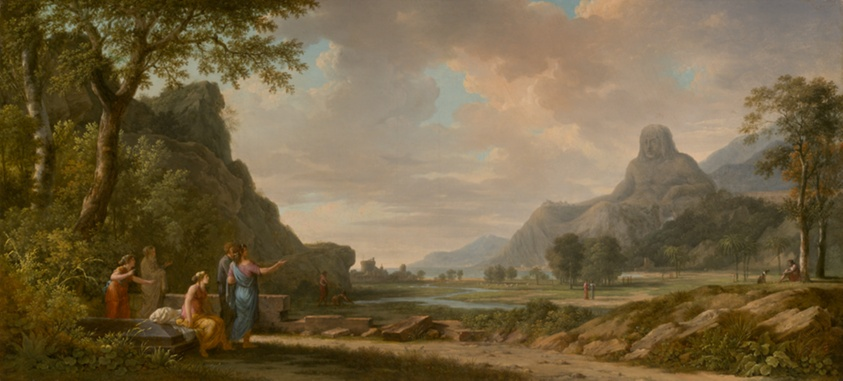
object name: Painting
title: Mount Athos Carved as a Monument to Alexander the Great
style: 18th Century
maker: Pierre-Henri de Valenciennes (French, 1750–1819)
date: 1796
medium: Oil on canvas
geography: France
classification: oil on canvas; paint; oil paintings (visual works); french; painting; european painting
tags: alexander the great, monumental structures, monuments, people, figure, figures, women, men, animals, dog, dogs, river, mountain, mountains, trees, landscape, bushes, landscapes, rocks